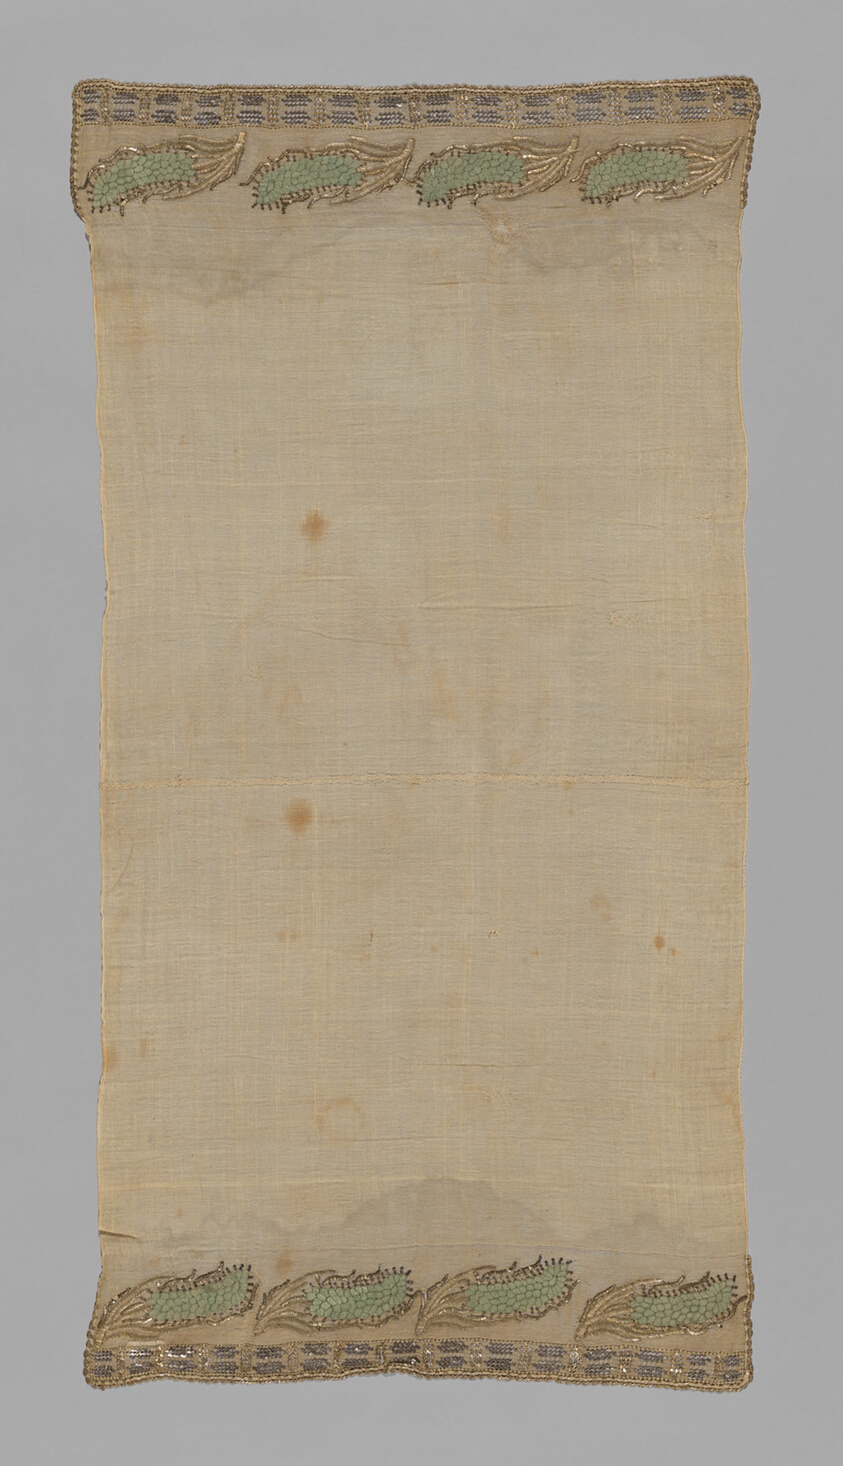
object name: Textile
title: Towel or Napkin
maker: Turkey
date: 19th century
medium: embroidered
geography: Turkey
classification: textile; weaving; needlework (visual works)